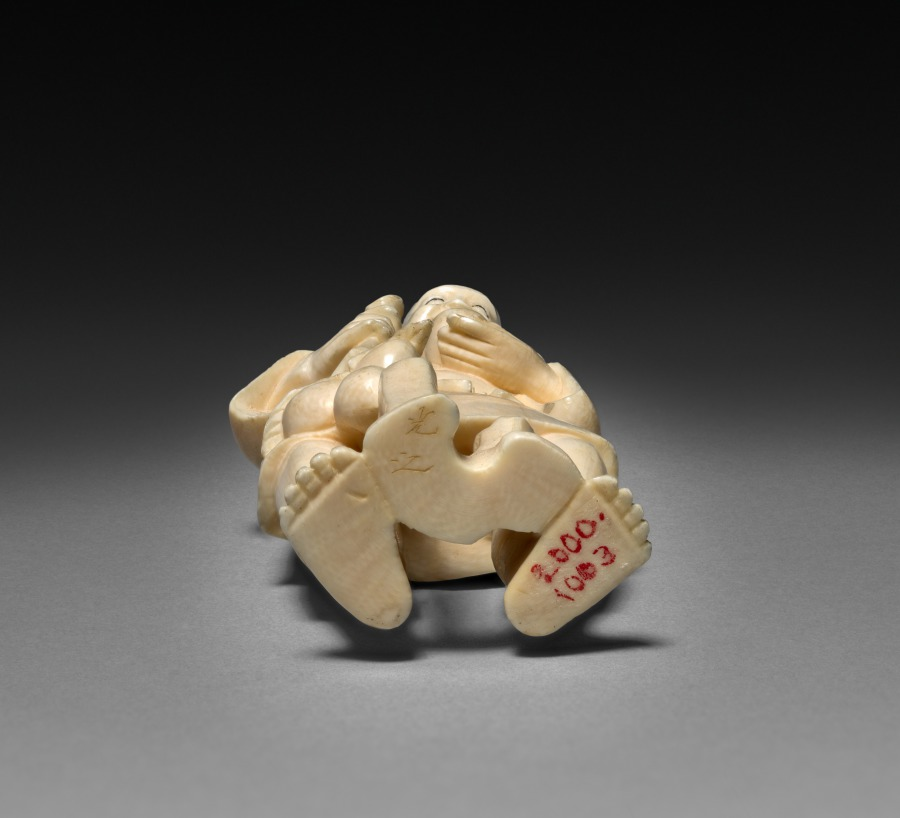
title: Man Holding Fruit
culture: Japan, Meiji period (1868–1912)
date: early 1900s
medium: ivory, pigment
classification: Ivory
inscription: 光江